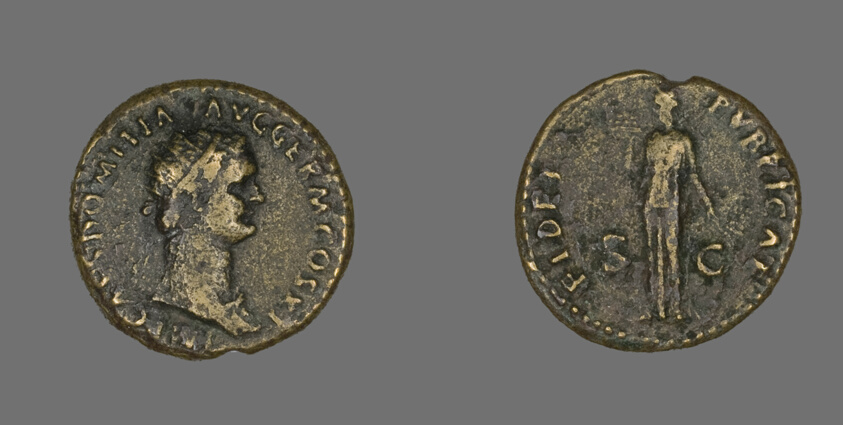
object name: Coin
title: Dupondius (Coin) Portraying Emperor Domitian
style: roman (ancient, style or period)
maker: Roman, minted in Rome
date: 85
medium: Bronze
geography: Roman Empire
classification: coin; ancient art